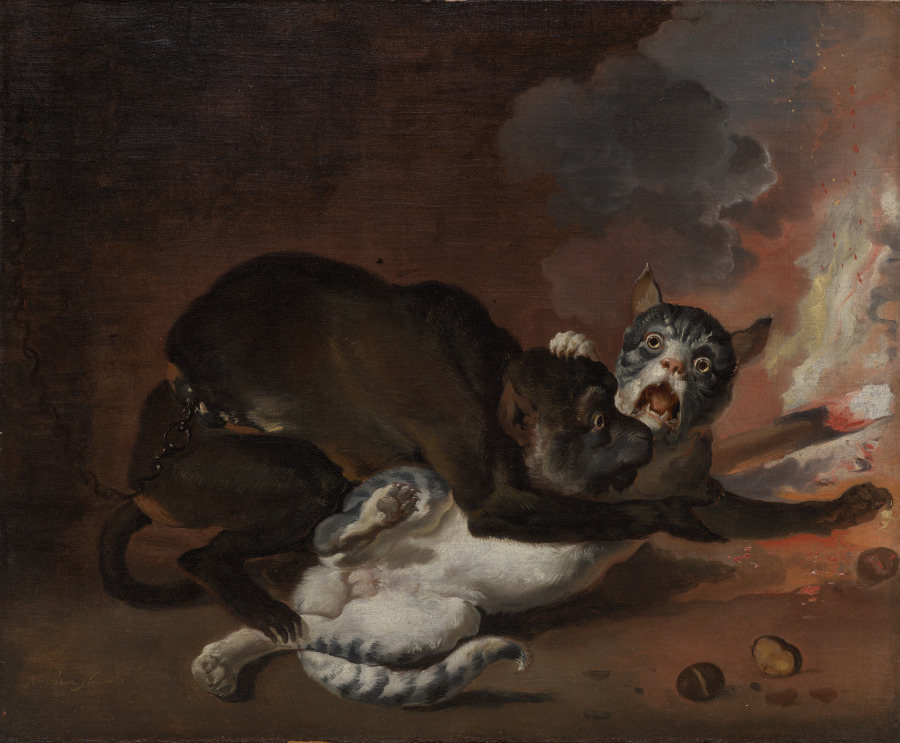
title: The Monkey and the Cat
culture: Netherlands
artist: Abraham Hondius (Dutch, c. 1625–1695)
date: probably 1670s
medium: oil on canvas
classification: Painting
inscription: Signed lower left: "Abraham Hondius"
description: This picture interprets one of Aesop’s ancient Greek fables (or probably the more contemporary interpretation by Jean de la Fontaine, even more famous at the time), which warns of the dangers of flattery. A monkey sweet-talks a cat into pulling scalding chestnuts out of the fire. The cat finishes the risky and painful task to discover that the monkey has already gobbled up nearly all of them.